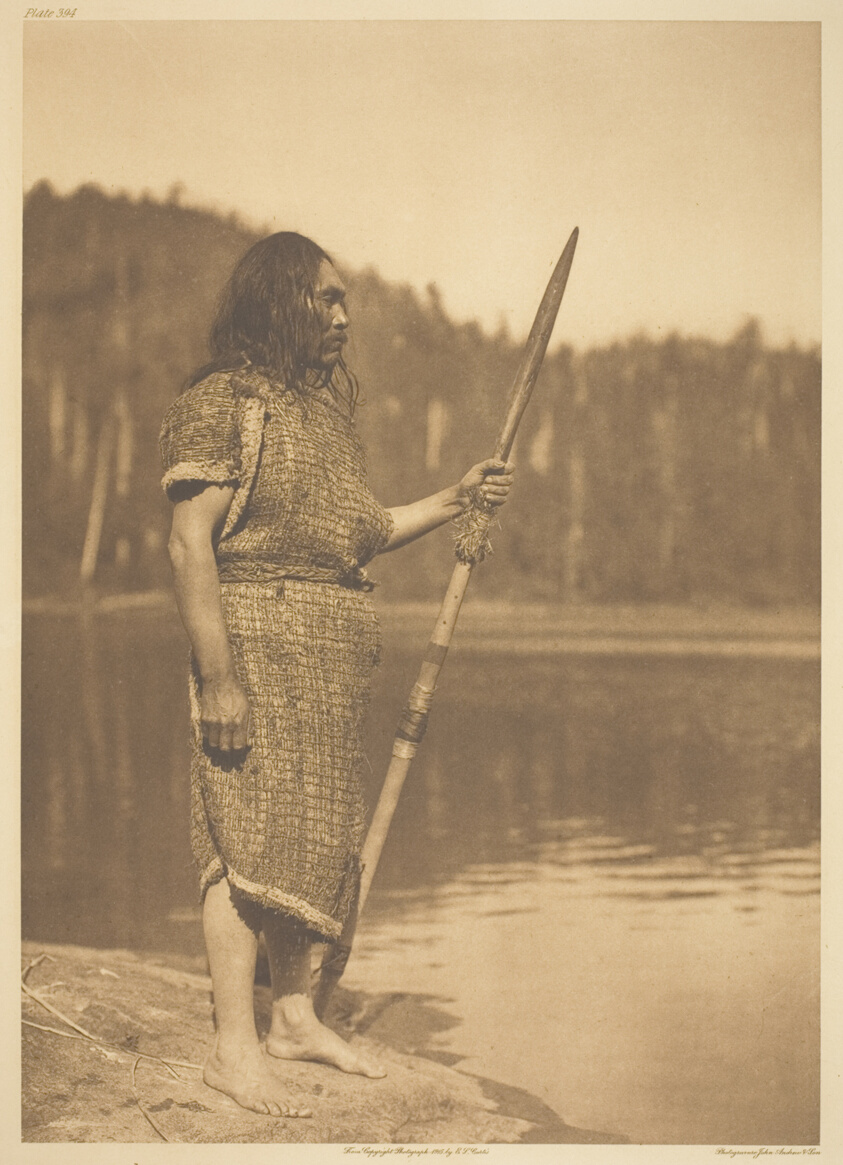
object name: Photograph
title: The Whaler-Clayoquot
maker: Edward S. Curtis (American, 1868–1952)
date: 1915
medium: Photogravure, plate 394 from "The North American Indian, Volume 11" (1916)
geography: United States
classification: photogravure; photomechanical process; photography; photograph